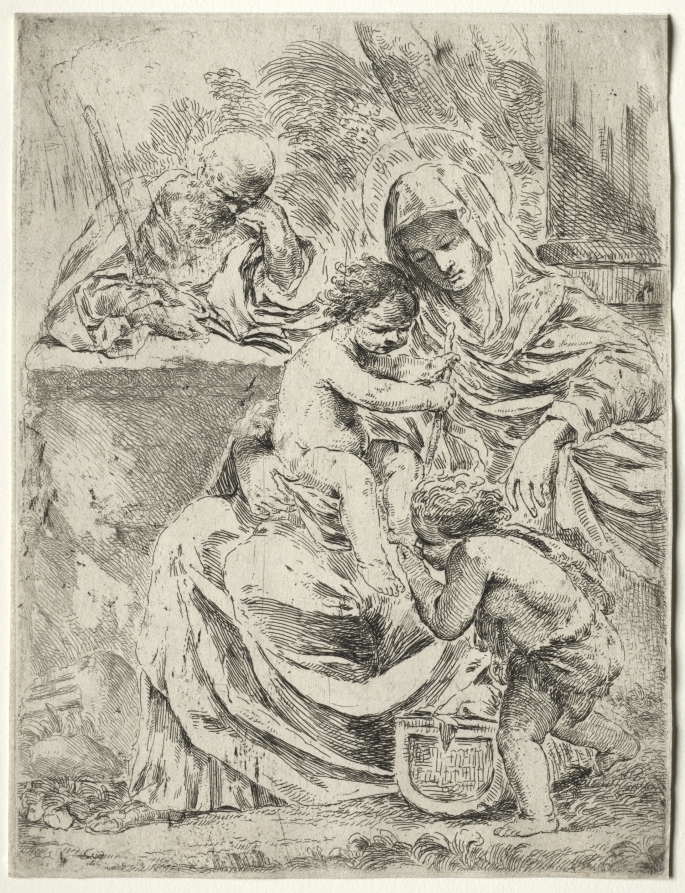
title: The Holy Family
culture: Italy, 17th century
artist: Francesco Amato (Italian)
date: 1610–40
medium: etching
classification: Print